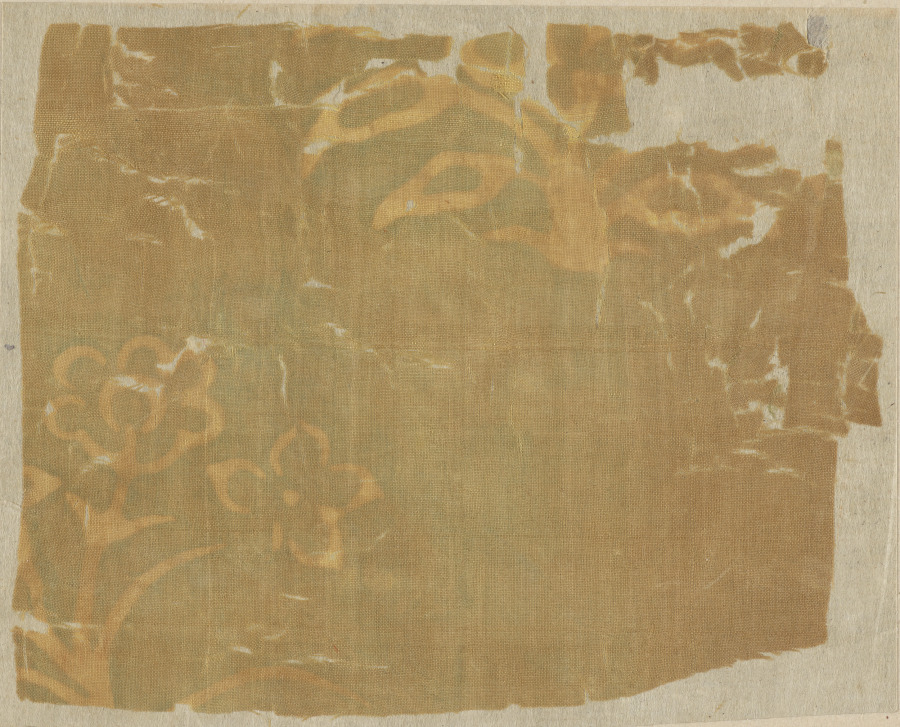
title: Fragment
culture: China or Japan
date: 700s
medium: tabby weave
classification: Textile